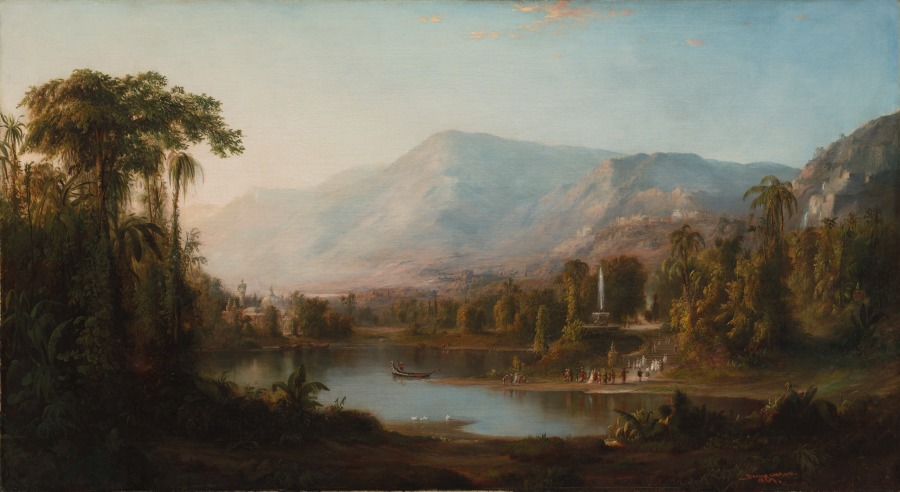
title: Vale of Kashmir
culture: America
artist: Robert S. Duncanson (American, 1821–1872)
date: 1867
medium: oil on canvas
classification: Painting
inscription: Inscribed at lower right: Duncanson. / 1867. / Cinti O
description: Cincinnati-based Duncanson was the first African American artist to achieve recognition both nationally and abroad. This panoramic painting, one of his grandest, was inspired by an episode in Thomas Moore’s then-popular epic poem, Lalla-Rookh (1817), which describes a Persian princess’s journey to the Indian subcontinent to be married. In Duncanson’s conception, members of a courtly entourage depart a quasi-Islamic palace, arriving by boat onto a scrim of land where they ascend a monumental staircase to a plaza with a fountain spraying an impressive plume of water. Despite these substantial storytelling details, the human elements remain subordinate to the overwhelming splendor of the natural landscape in and of itself.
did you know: During the Civil War, Duncanson relocated to Montreal, where he inspired several Canadian landscape painters.